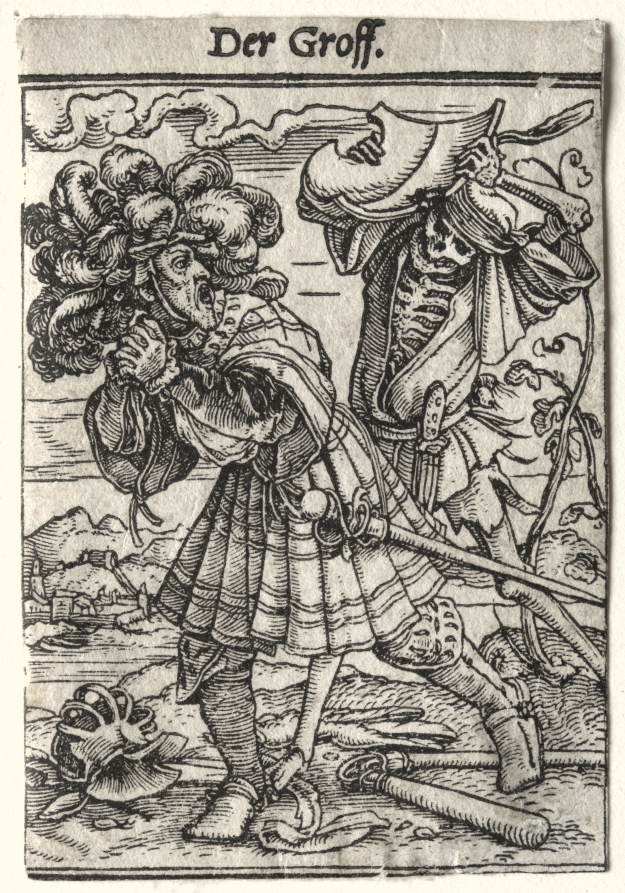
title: Dance of Death: The Count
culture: Germany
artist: Hans Holbein the Younger (German, active England and Switzerland, 1497/98–1543)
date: c. 1526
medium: woodcut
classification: Print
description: Dance of Death is the most celebrated series of woodcuts designed by Holbein. The 41 blocks were cut by Hans Lützelburger in the years immediately before his death in 1526, though the set was not published until 1538. Dance of Death originated as a drama in the middle of the 1300s. Following widespread epidemics such as the black plague, these plays took place in a cemetery or churchyard. Dressed in pale costumes painted to resemble skeletons, actors personified Death and summoned a group of people from all social classes in a dancelike procession. In a period when the life span was short, the purpose of the Dance of Death was to remind the people to prepare for the Last Judgement.